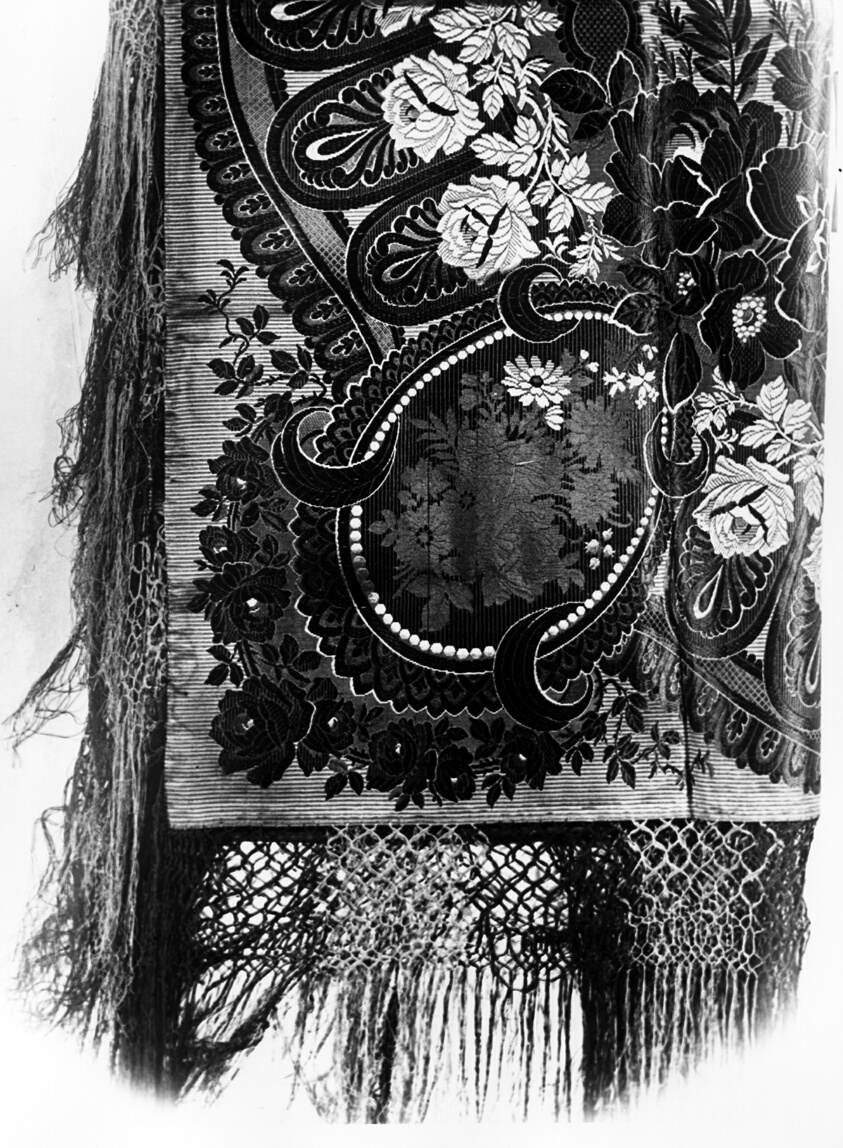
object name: Costume and Accessories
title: Shawl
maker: England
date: 1865/70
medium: Silk and cotton, compound weave; knotted silk fringe; floral and lace pattern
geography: England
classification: textile; weaving; costume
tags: fashion